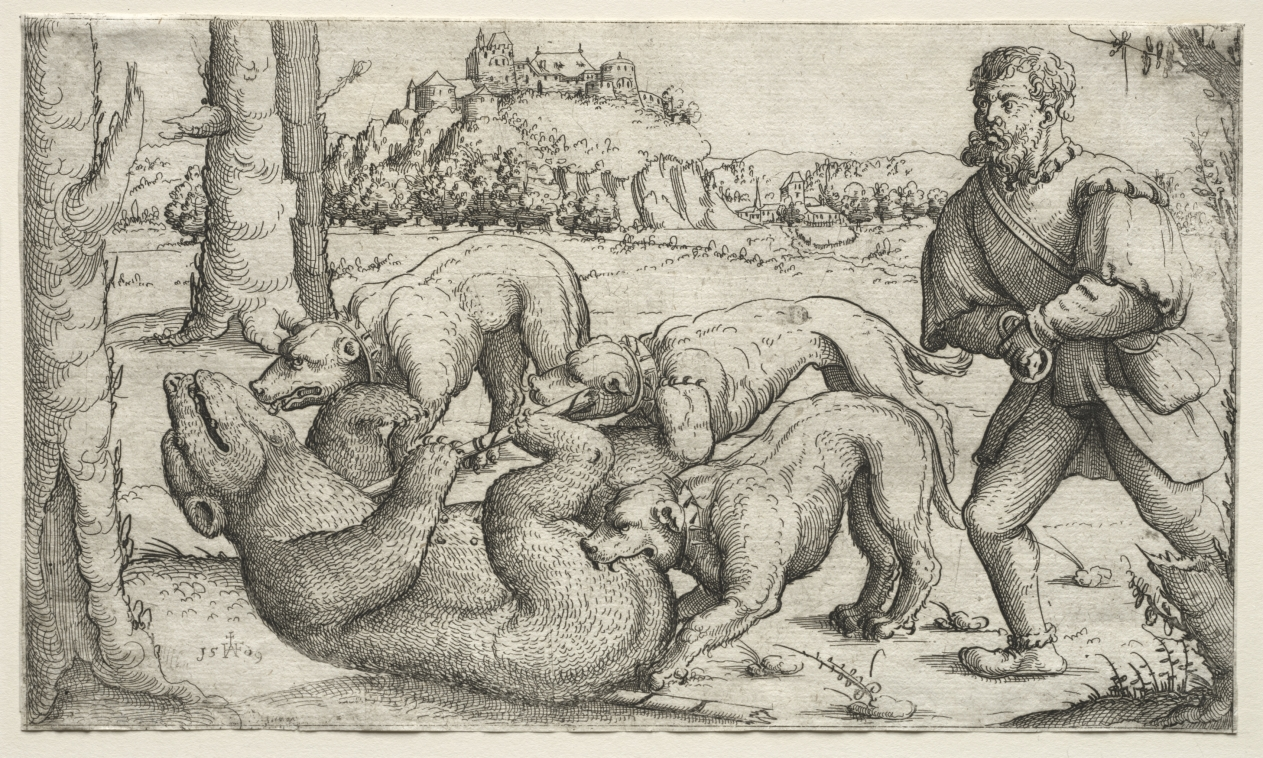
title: A Bear Hunt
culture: Germany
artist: Augustin Hirschvogel (German, 1503–1553)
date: 1569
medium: etching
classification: Print